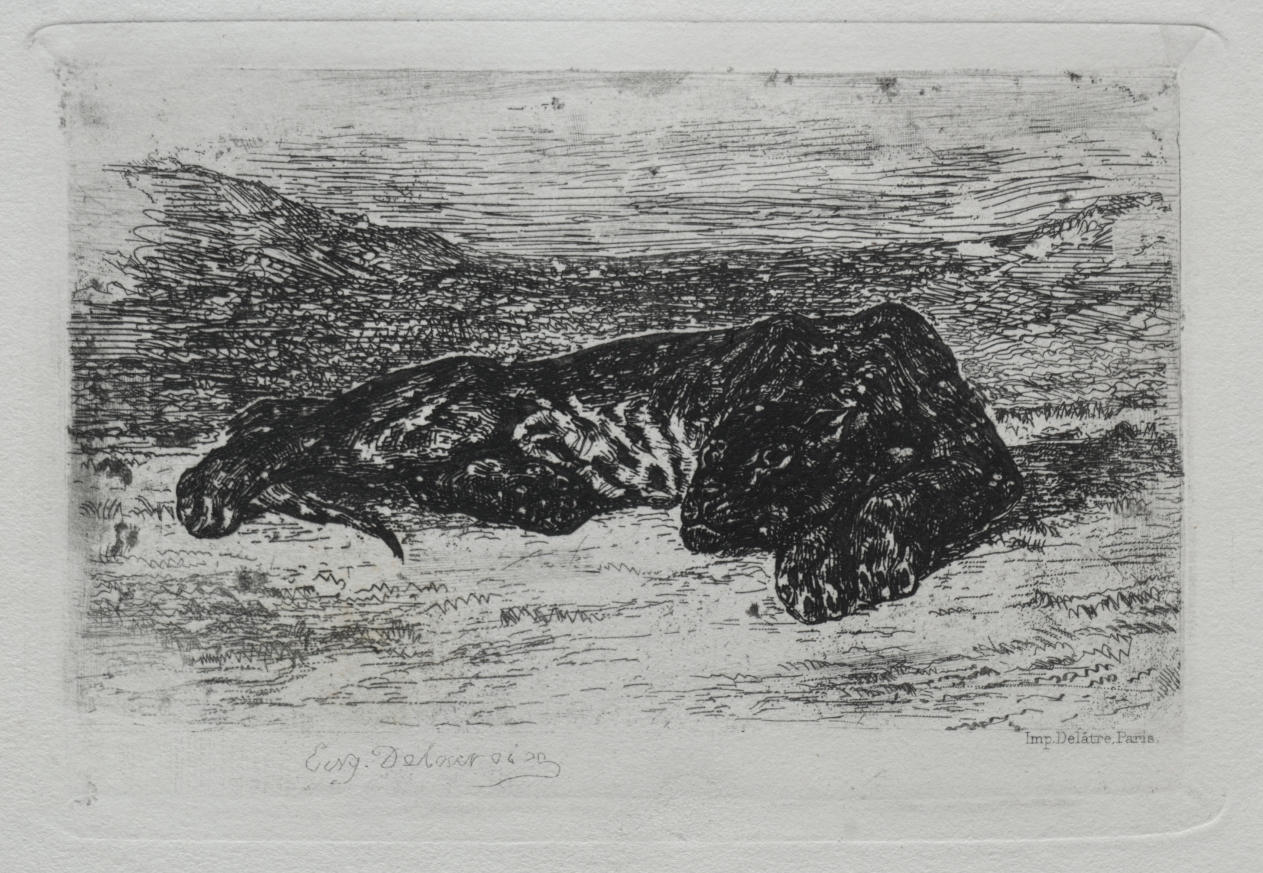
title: Crouching Tiger in the Desert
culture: France, 19th century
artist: Eugène Delacroix (French, 1798–1863)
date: 1846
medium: etching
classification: Print